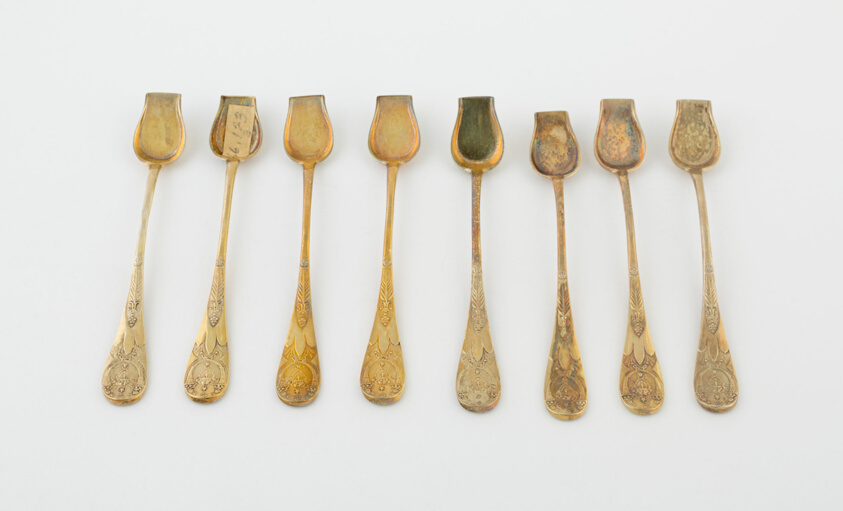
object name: Metalwork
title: Set of Salt Spoons (10)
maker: Martin-Guillaume Biennais; French, 1764–1843; Pierre-Benoît Lorillon; French, 1757–1816; Paris, France; Pietro Paola Spagna; Italian, 1793-1861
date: 1789–1820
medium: Silver gilt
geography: Paris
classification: silver; metalwork; european decorative arts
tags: Borghese Service